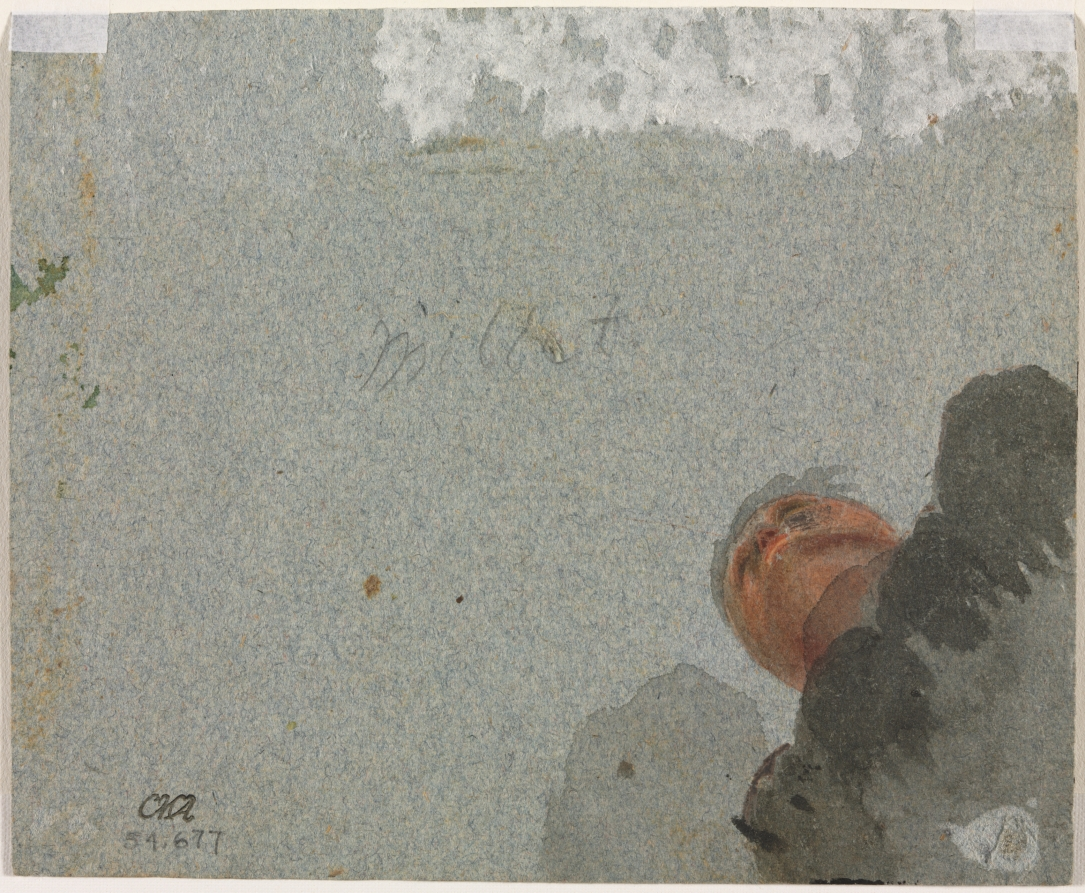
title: Study of a Head seen from Below (verso)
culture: France, 17th century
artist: attributed to Francisque Millet (French, 1642–1679)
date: c. 1650–75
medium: brush and gray and red wash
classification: Drawing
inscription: center, in graphite: Millet